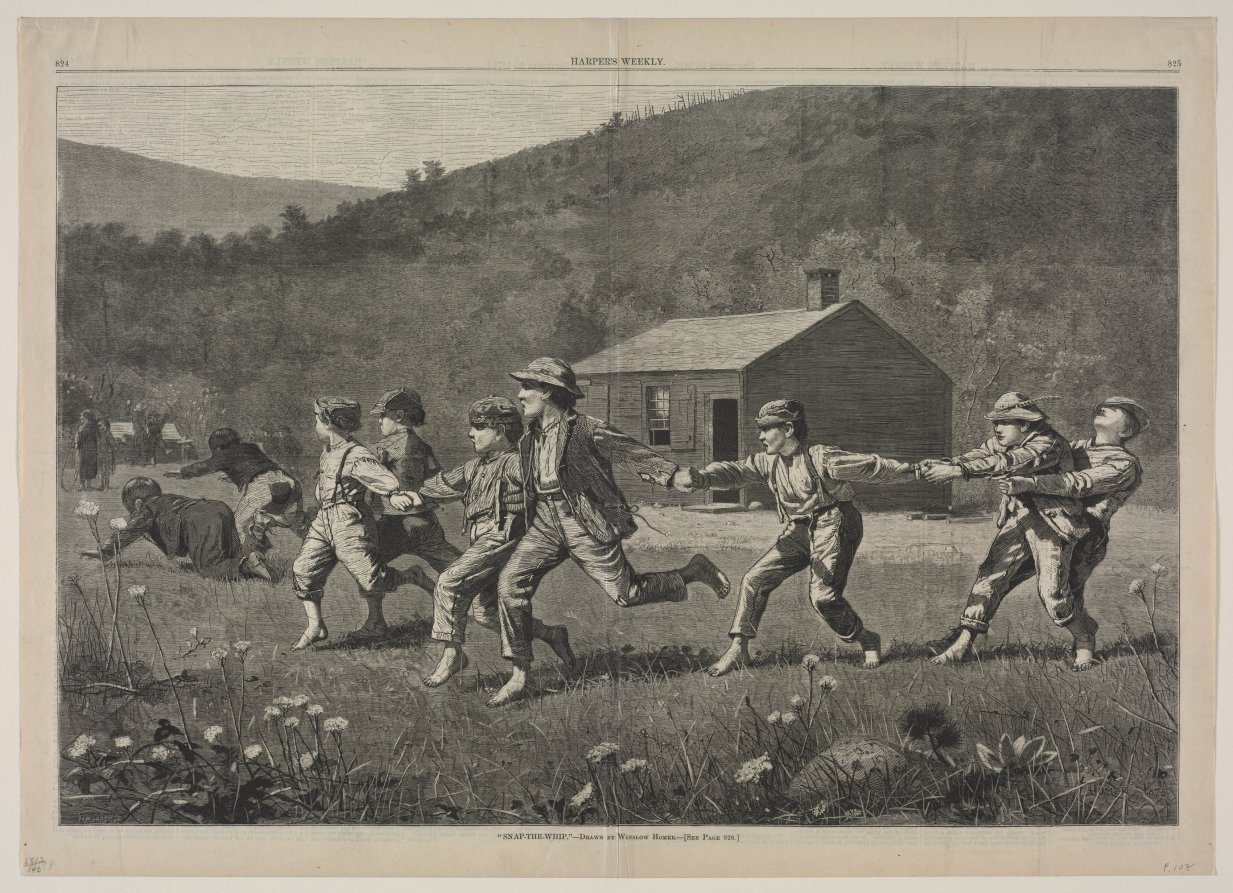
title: "Snap-the-Whip"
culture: America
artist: Winslow Homer (American, 1836–1910)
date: 1873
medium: wood engraving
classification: Print